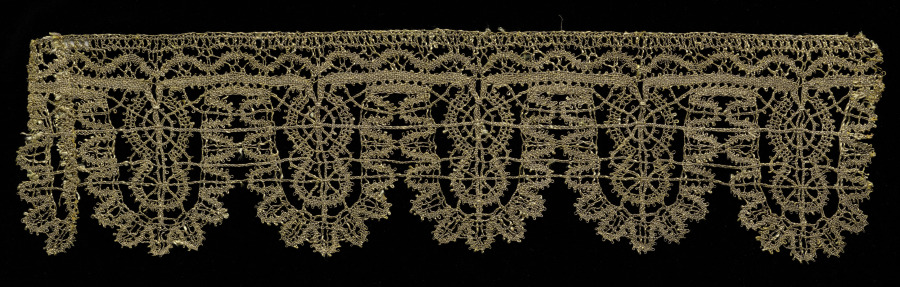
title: Lace Edging of Points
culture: Italy, Genoa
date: 1600s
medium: Metal thread: bobbin lace (rose lace)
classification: Lace